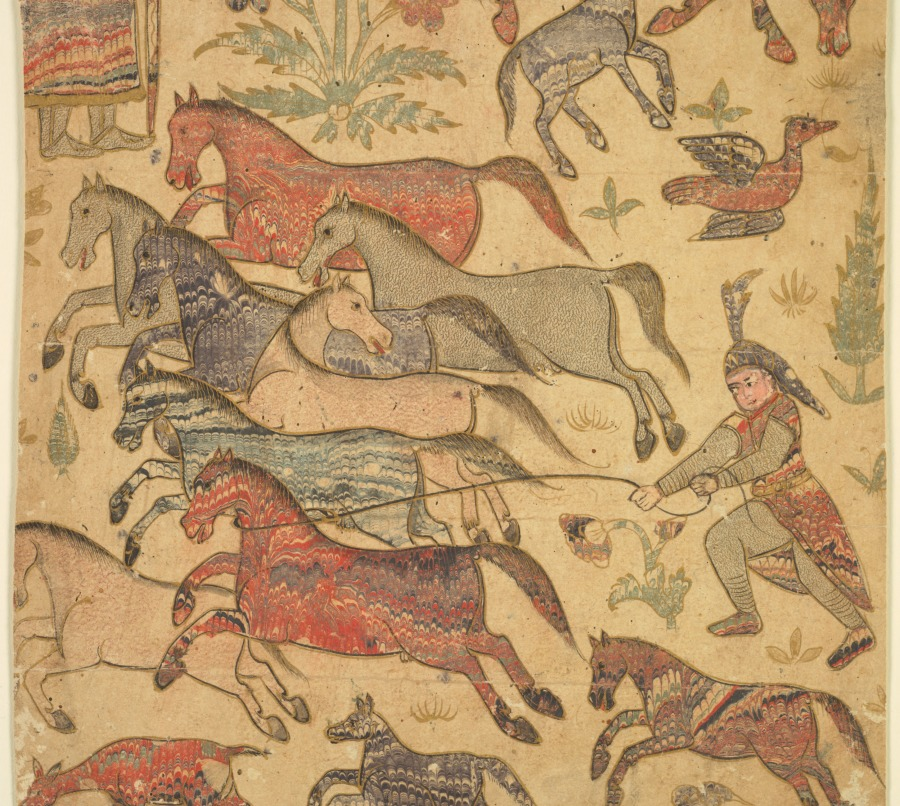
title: A marbled picture of Rustam catching Rakhsh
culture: India, Bijapur, Deccan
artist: attributed to Shafi (Indian, active about 1650)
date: c. 1650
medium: Gum tempera and gold on paper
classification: Painting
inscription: apocryphal inscription lower left: 'amal-i mir Kalan 904 verso: inscription identifying the scene of Rustam capturing Rakhsh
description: This scene depicts the young hero Rustam catching a foal, Rakhsh (meaning “light”), who will be his faithful companion through many adventures. A prophet-like shepherd figure with a staff at the upper left predicts that Rustam will be the savior of Iran. At the top of the page a feline has caught its prey, while a hunter steps on its tail. This extraordinary painting has more applications of marbled colorant than any other known example. Even all the flowers and birds have been articulated through marbling in a feat of registration and control by a master of the technique.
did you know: Even the flowers and insects used as filler in this composition were marbled.